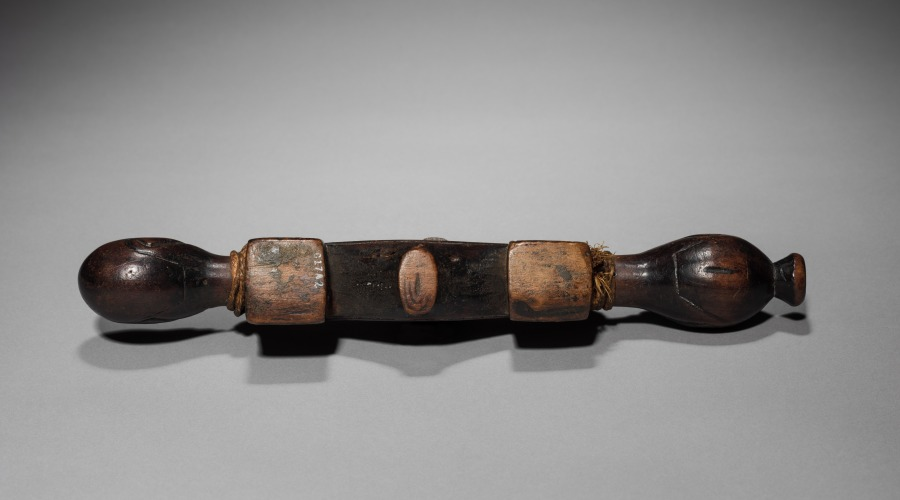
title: Divination Implement (itombwa)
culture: Africa, Central Africa, Democratic Republic of the Congo, Kuba-style maker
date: 1890–1910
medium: Wood and plant fiber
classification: Sculpture